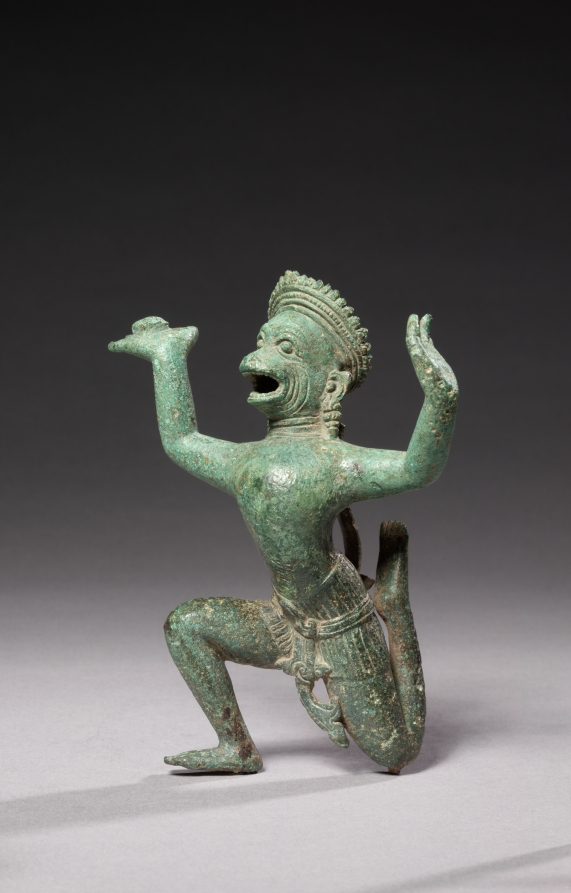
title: Flying Hanuman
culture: Cambodia, Koh Ker style, 10th century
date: 900s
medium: bronze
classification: Sculpture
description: Hanuman is most prominently featured in the Indian epic Ramayana, which had gained popularity in Cambodia by the 600s. In a dramatic scene from the epic, Hanuman, who is able to fly, raises his left hand in a gesture meaning "Fear not!" In his raised right hand he carries an antidote to a poison that has rendered the hero Rama and his brother paralyzed and dying. This antidote from the Himalaya Mountains will restore them to full vigor so that they will be able to win the war against the demons and rescue Rama's wife Sita. The garment's wide parallel pleat lines, the swinging flared swath between his legs, the tiered conical crown, and the broad volumes of the chest are stylistic hallmarks of Khmer art of the tenth century.